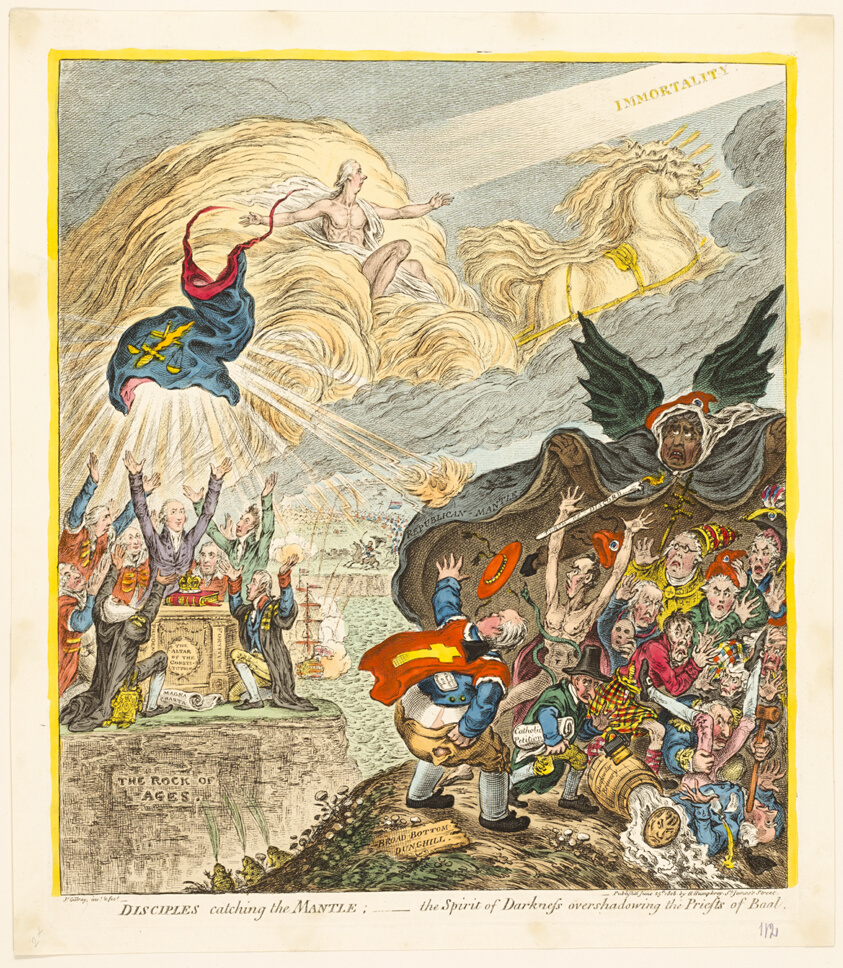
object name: Print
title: Disciples Catching the Mantle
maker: James Gillray (English, 1756-1815); published by Hannah Humphrey (English, c. 1745-1818)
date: published June 25, 1808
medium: Hand-colored etching on paper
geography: England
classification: etching; print; prints and drawing